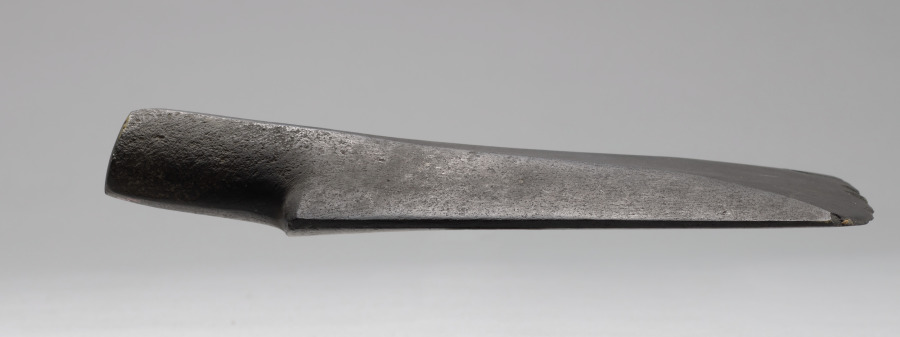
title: Blade from a Ceremonial Adze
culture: Polynesia, Mangaia, Cook Islands, 19th century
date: 1800s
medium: stone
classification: Sculpture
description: Before European contact, Polynesian carving tools were fashioned from bone, shell, stone, or teeth. The introduction of iron tools facilitated carving, while the demand of European sailors and missionaries for souvenirs provided a new market for craft products. Ceremonial adzes probably represented gods or spirits. The wooden handle of this example is carved with the characteristic K motif. The stone adze blade is lashed to the handle with finely plaited sennit fiber cord. According to legend, the distinctive pattern formed by the sennit lashing was taught to Mangaian craftsman by the gods.